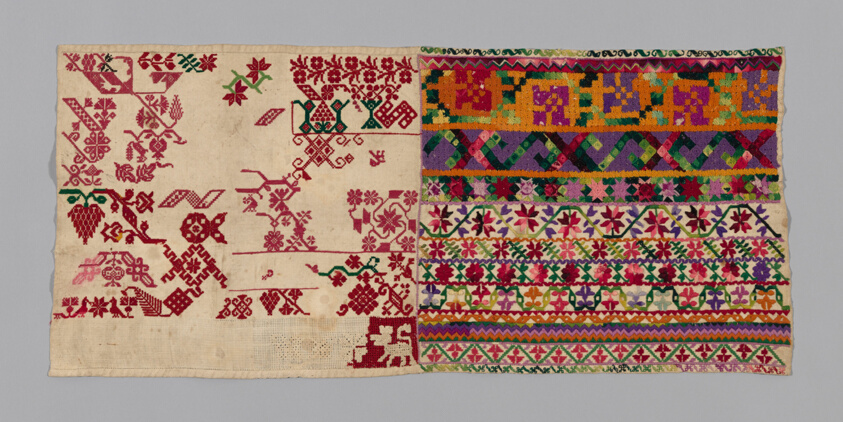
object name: Textile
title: Sampler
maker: Mexico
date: 1825/75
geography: Mexico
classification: textile; weaving; needlework (visual works); sampler